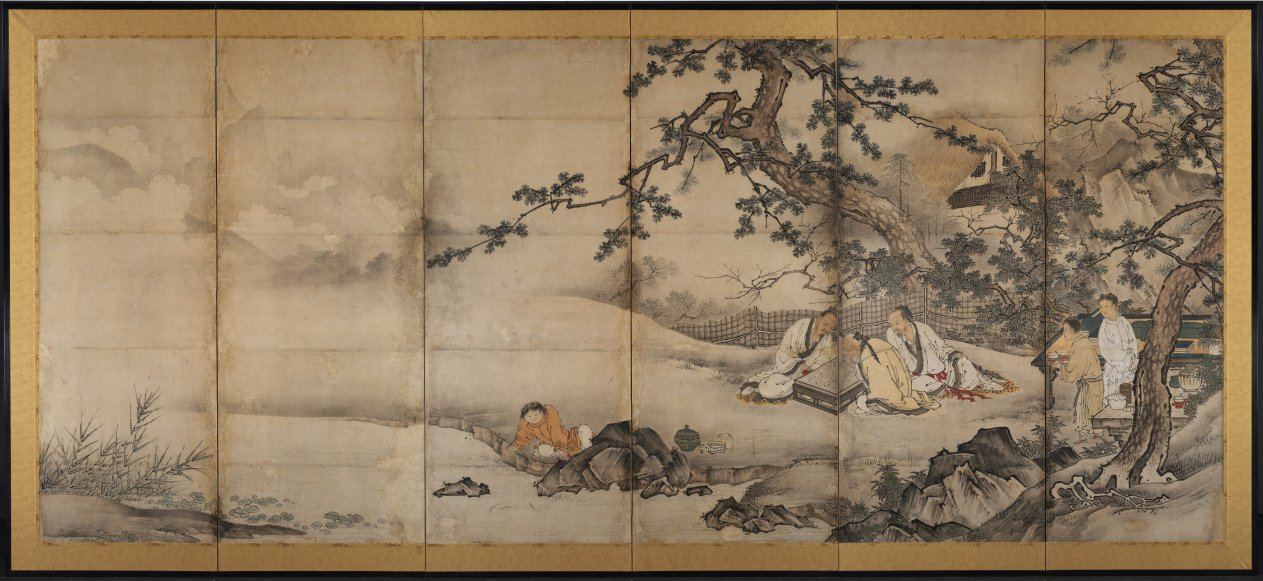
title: The Four Accomplishments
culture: Japan, Momoyama period (1573–1615)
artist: attributed to Kano Shōei (Japanese, 1519–1592)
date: late 1500s–early 1600s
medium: One of a pair of six-panel folding screens; ink and slight color on paper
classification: Painting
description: This is one of a pair of screens that shows a group of elite Chinese gentlemen and their servants in the countryside. One man looks on as two of his companions play a board game. Nearby is a table set with a selection of books and a qin, a type of stringed instrument, still wrapped in its cloth case, waiting to be played. The mood is one of enjoyment balanced with formality. Historically, playing the qin or qi (a game similar to chess called go in Japan), and practicing or admiring calligraphy were considered three skills essential for cultured men in China.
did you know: One of the servants is diverted by the motion of a fish in the water.